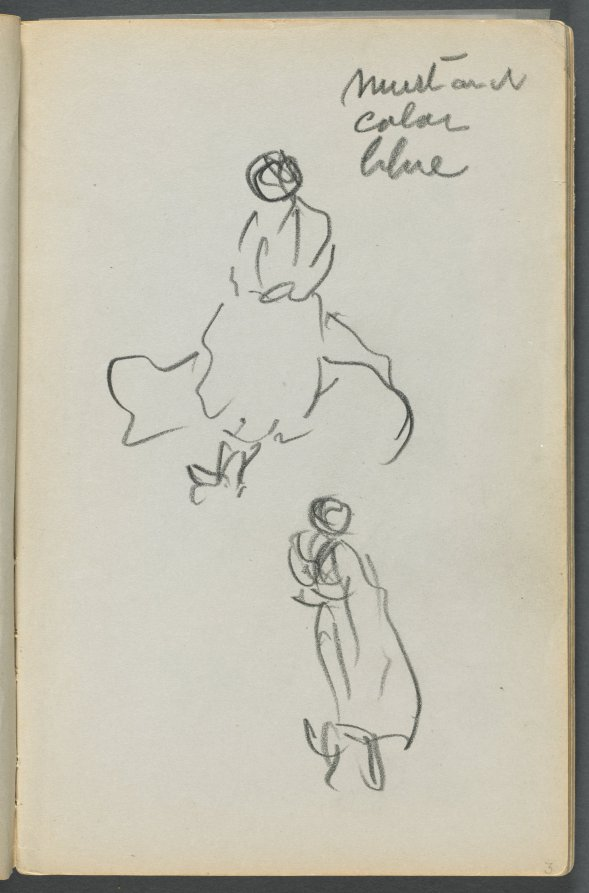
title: Sketchbook, The Dells, N° 127, page 003: Two Figures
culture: America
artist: Maurice Prendergast (American, born Newfoundland [now Canada], 1858–1924)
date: c. 1919–1921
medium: graphite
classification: Bound Volume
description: This sketchbook contains 59 pages of graphite drawings and 16 watercolors made at various locations on Cape Ann, Massachusetts.